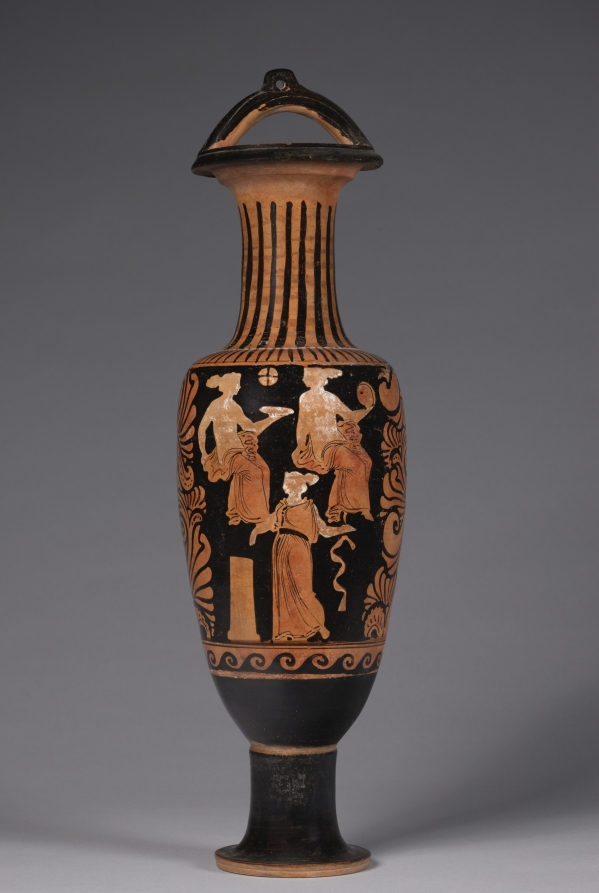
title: Red-Figure Bail Amphora (Storage Vessel): Draped Women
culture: South Italian, Campanian, Cumaean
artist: attributed to CA Painter, Walters Sub-group (South Italian, Campanian, active at Cumae, c. 350–320 BCE)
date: 330–320 BCE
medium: ceramic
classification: Ceramic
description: The bail amphora, named for the tall handle arching over the mouth, is a shape made primarily in Campania, where red-figure vases were produced at both Capua and Cumae in the 4th century BC. The anonymous painter of this vase is known as the CA Painter, for Cumae A, the first significant artist in this area. The seated and standing women on both sides of the vase, some only partially draped (and their white skin now largely lost), recall those on many of the painter’s other vases, as do the elaborate palmette patterns on either side.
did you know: This vase once belonged to the famous opera singer Evan Gorga.